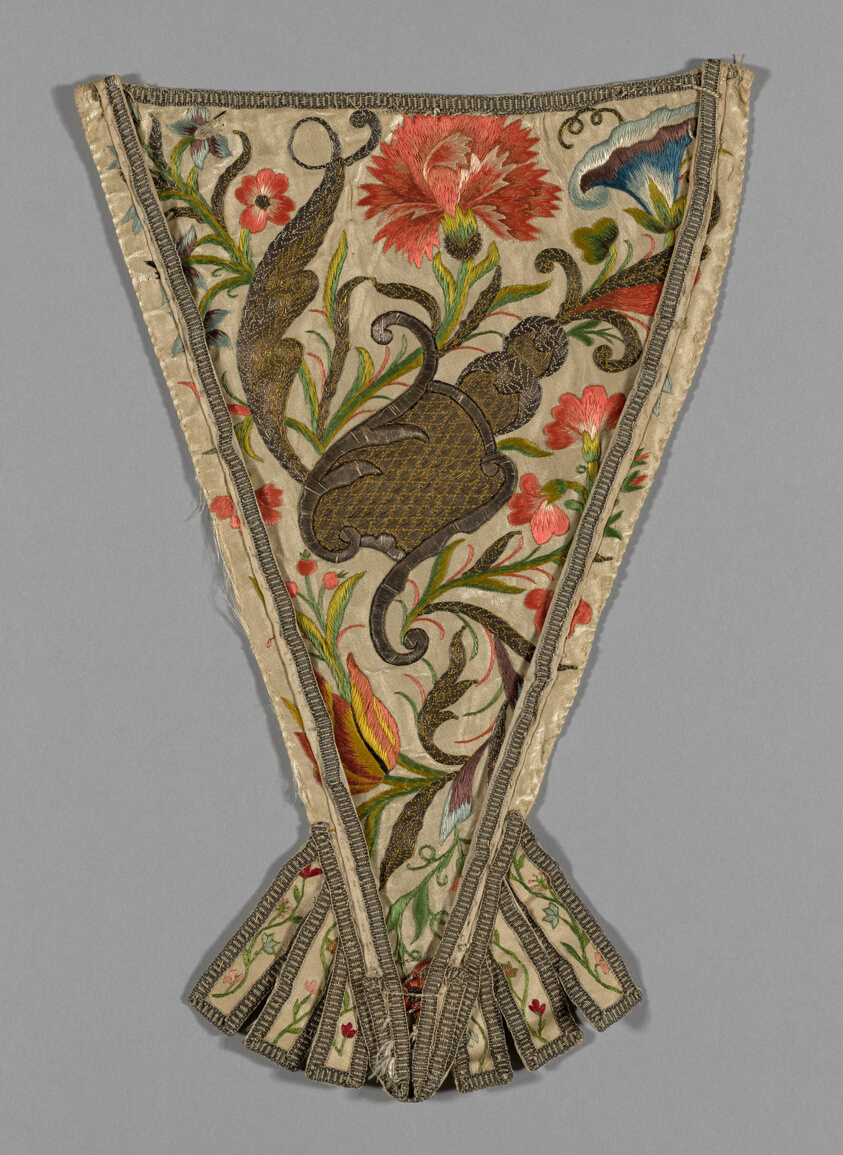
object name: Textile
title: Stomacher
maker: France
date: 18th century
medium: Silk, plain weave with needlework in silk; gold and silver foil wound around silk fibre core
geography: France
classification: textile; needlework (visual works); costume